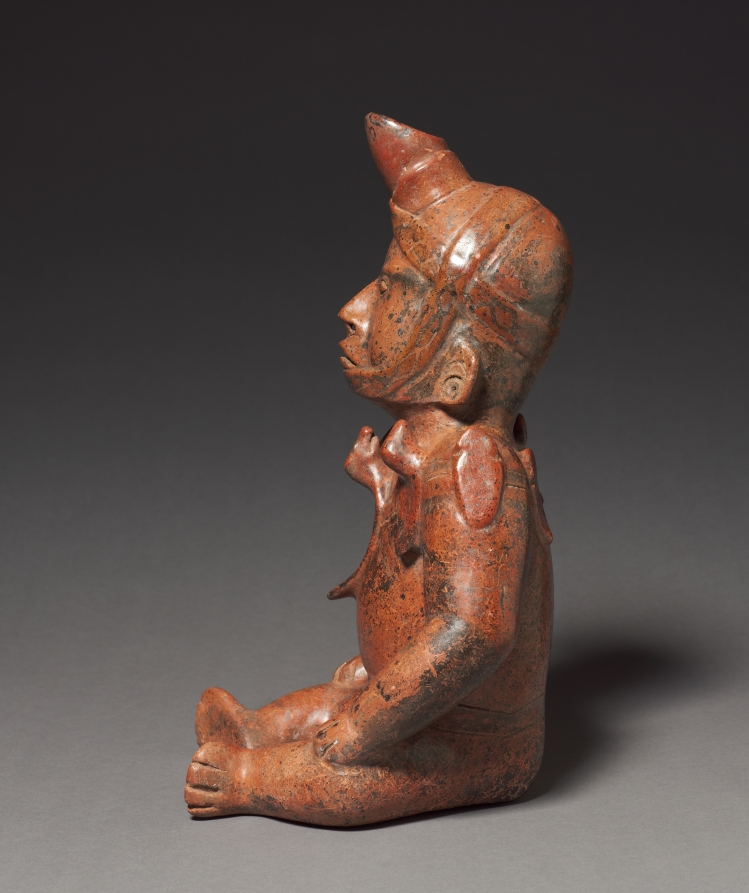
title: "Horned" Male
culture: West Mexico, Colima, Comala style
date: 100 BCE–300 CE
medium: earthenware with colored slips, black burial deposits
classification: Sculpture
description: This figure’s concentrated, otherworldly expression is emphasized by the hornlike element strapped to its forehead. This "horn" may be the spire of a conch shell, which comes from water and, therefore, refers to fertility—likely an important ritual concern of West Mexican chiefs. The element also could represent the "horn of power" worn in some areas of the world by shamans, the spiritual leaders and healers of small, nonindustrial societies.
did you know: This figure’s “horn” may be the spire of a conch shell, a reference to fertility.